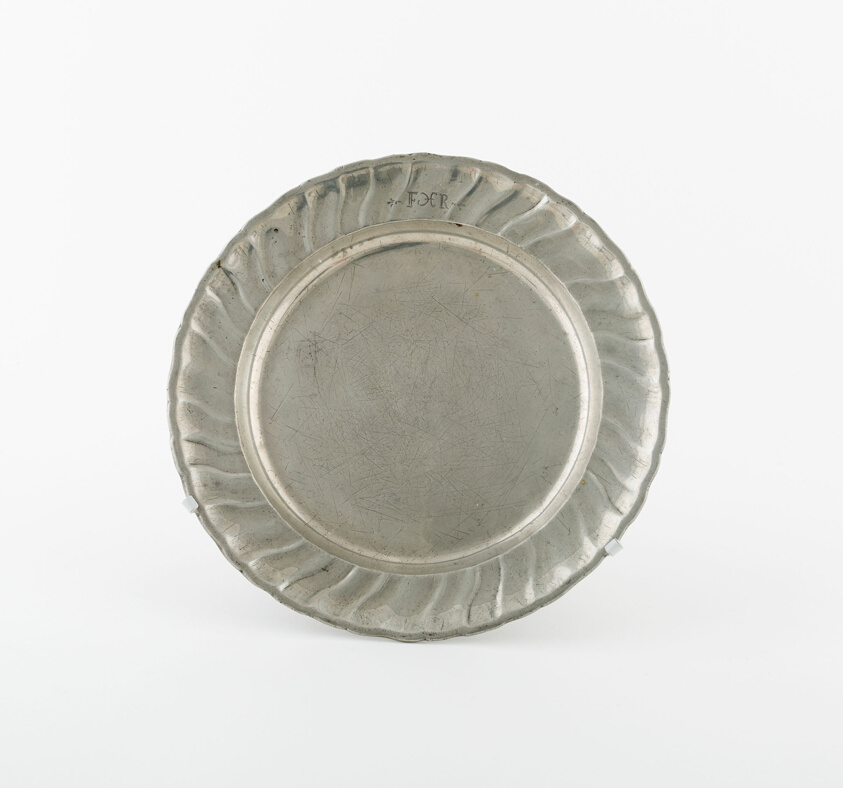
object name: Metalwork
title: Plate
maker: Joseph Heilingotter IV; Czech, c. 1777; Czechoslovakia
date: c. 1777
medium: Pewter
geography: Czech Republic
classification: plate (general, dish); pewter; dish (vessel); metalwork; european decorative arts